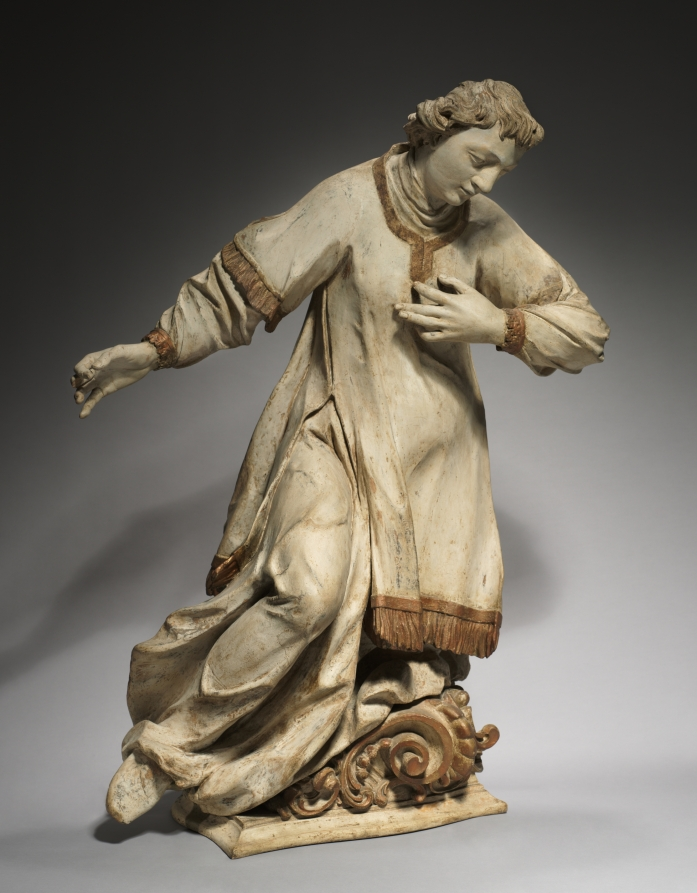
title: Kneeling Saint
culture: Germany, Munich, second half 18th century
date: 1750–1800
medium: painted and gilded wood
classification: Sculpture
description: This serene figure would originally have been part of a larger group, perhaps shown kneeling in adoration of Christ or the Virgin. He wears a knee-length dalmatic, the ecclesiastical dress of deacons (ordained ministers in the Catholic Church). Saints Lawrence and Stephen were among the most popular deacon saints, but lacking an identifying attribute—probably once attached to the saint’s outstretched hand—it is not possible to associate this figure with a specific saint.